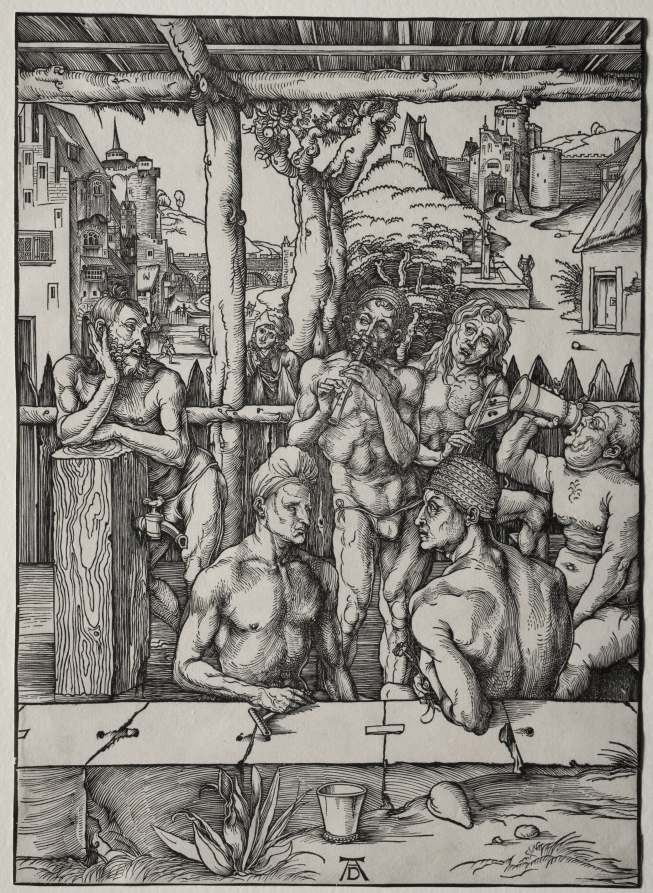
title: The Men's Bath House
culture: Germany, late 15th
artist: Albrecht Dürer (German, 1471–1528)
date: c. 1496–97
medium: woodcut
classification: Print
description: Albrecht Dürer’s depiction of men relaxing in a public bath house was unusual in the early 1500s because it showed nudity without an accompanying mythological or biblical narrative. The print showcases Dürer’s ability to depict the male figure in various inventive poses and may feature portraits of some of his friends. Meant to be studied closely, the image includes visual puns such as the faucet placed near the man’s groin at left. The popularity of the print during Dürer’s lifetime may relate to the 1496 closure of the public bath in his hometown of Nuremberg to prevent a syphilis outbreak.